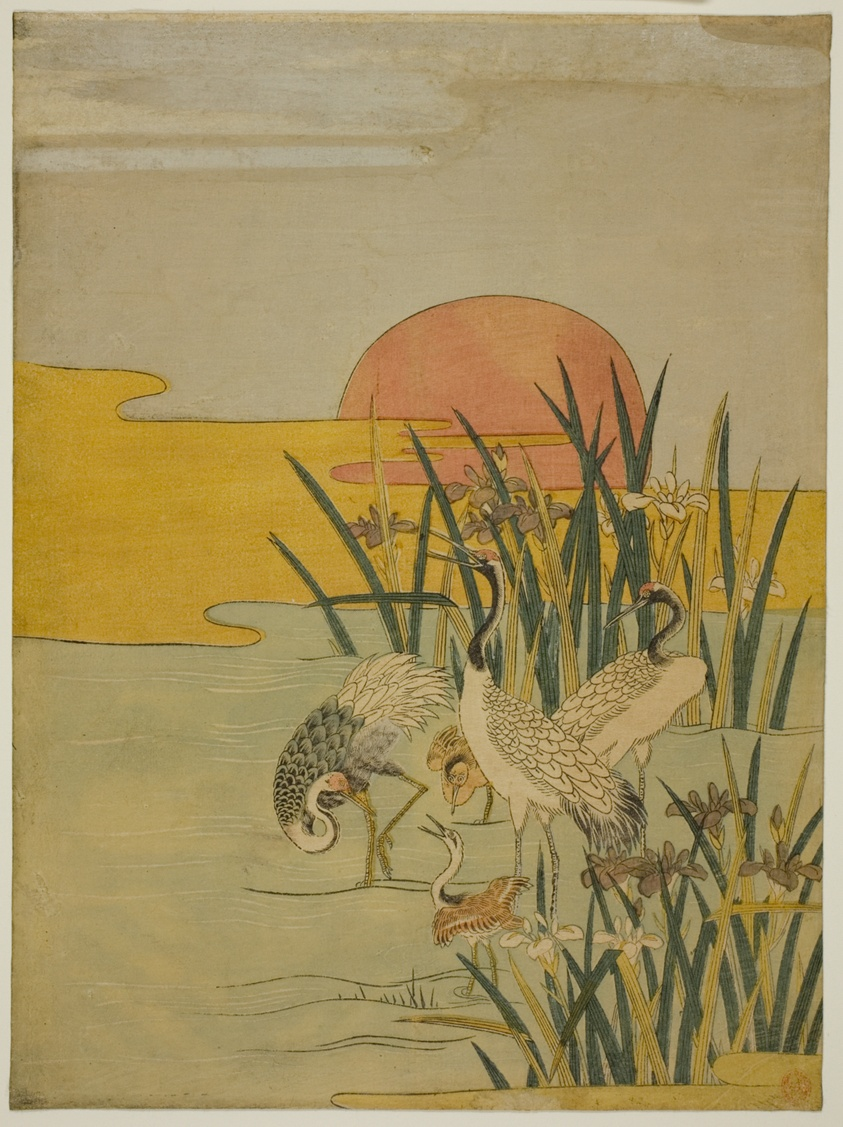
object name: Print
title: Cranes in an Iris Pond at Sunrise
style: Japanese (culture or style)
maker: Attributed to Isoda Koryusai; Japanese, 1735-1790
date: c. 1774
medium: Color woodblock print; chuban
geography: Japan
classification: woodblock print; print; asian art